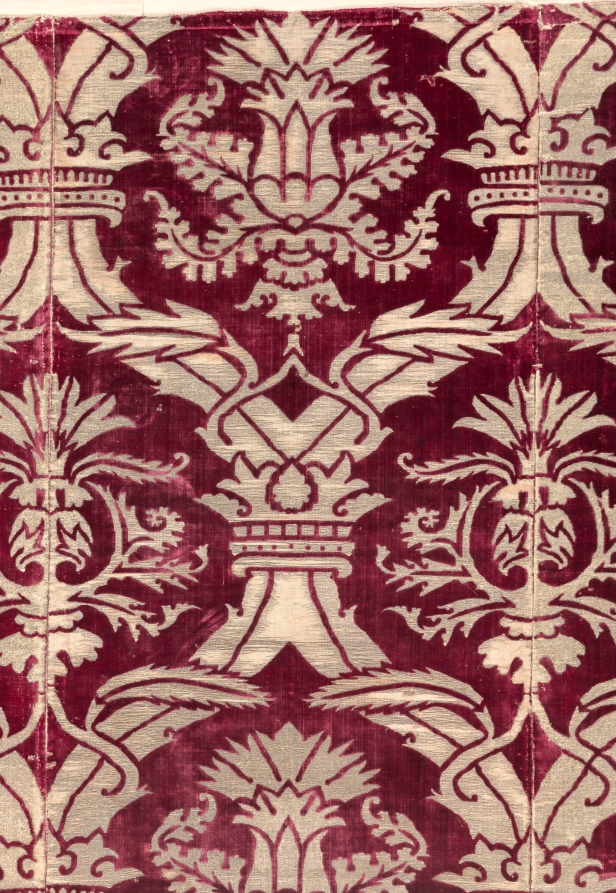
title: Brocaded Velvet Panel with Italianate Pattern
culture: Turkey, Istanbul or Bursa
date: 1575–1625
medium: Silk: velvet, brocaded; gilt-metal thread and cotton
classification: Velvet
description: Rarely are four fabric widths preserved together from any culture. This gilt-metal thread pattern combines Turkish and Italian features: the large ogival (curved) lattice clasped by crowns and the velvet structure are Turkish, and the two so-called artichoke designs are enlarged adaptations of Italian motifs. A symbol of wealth and power, this velvet panel was woven during the artistic height of the Ottoman Empire in the late 1500s. It may have covered a divan (sofa) or possibly enhanced a wall during cold winters in the imperial Topkapi Palace in Istanbul.